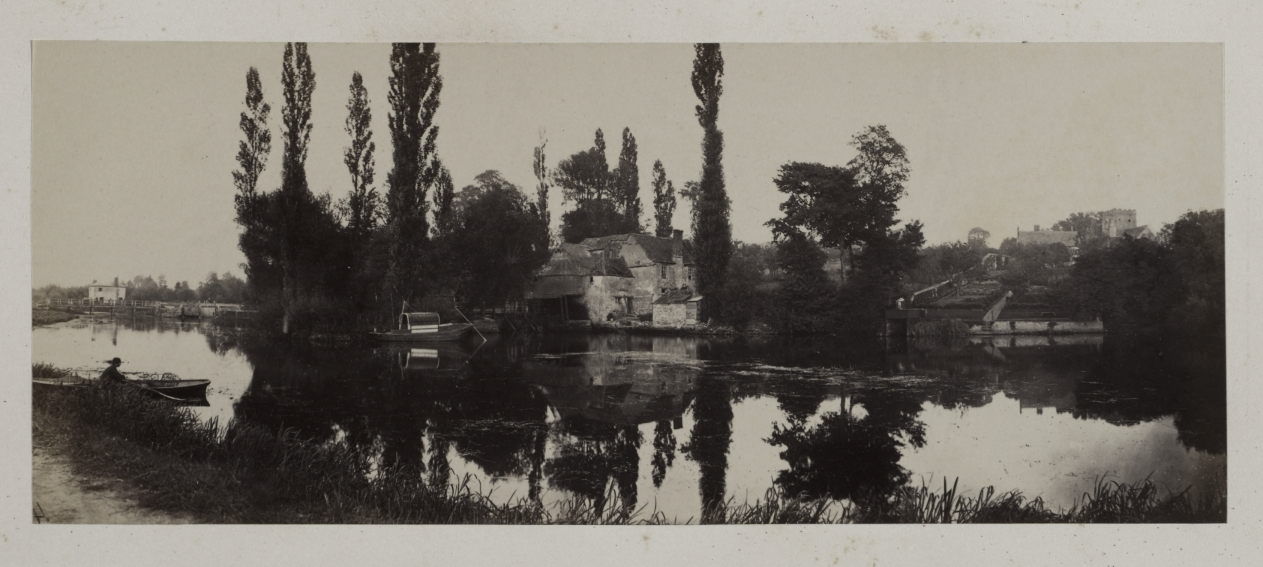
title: Iffley Mill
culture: England, 19th century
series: The Thames from London to Oxford in Forty Photographs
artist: Victor Prout (British, 1835–1877)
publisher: London, Virtue and Company [First and Second Series]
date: 1862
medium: albumen print from wet collodion negative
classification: Photograph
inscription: Written in pencil on recto: "M2032"